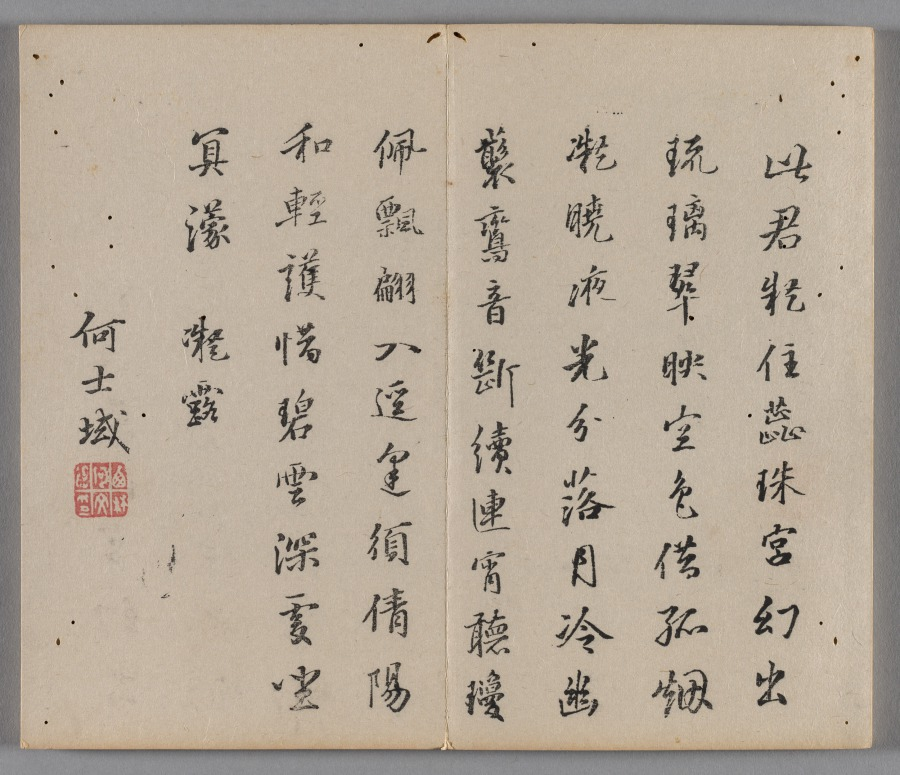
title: Ten Bamboo Studio Painting and Calligraphy Handbook (Shizhuzhai shuhua pu): Bamboo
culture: China, Qing dynasty (1644-1911)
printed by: Hu Zhengyan (Chinese, c. 1584–1674)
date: 1633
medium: Woodblock-printed book; ink and colors on paper; first edition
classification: Print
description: Color printing reached a level of perfection in the early 1600s, as seen in this Ten Bamboo Studio Collection of Calligraphy and Painting and the Mustard Seed Garden Manual of Painting (printed 1679 and 1701). The painterly quality, precision in registering (aligning) the woodblocks, and harmonious colors made them the most successful color print editions in Chinese history. Both editions were printed and compiled in Nanjing, spread nationwide, and had a great impact on the arts in Japan and Korea.